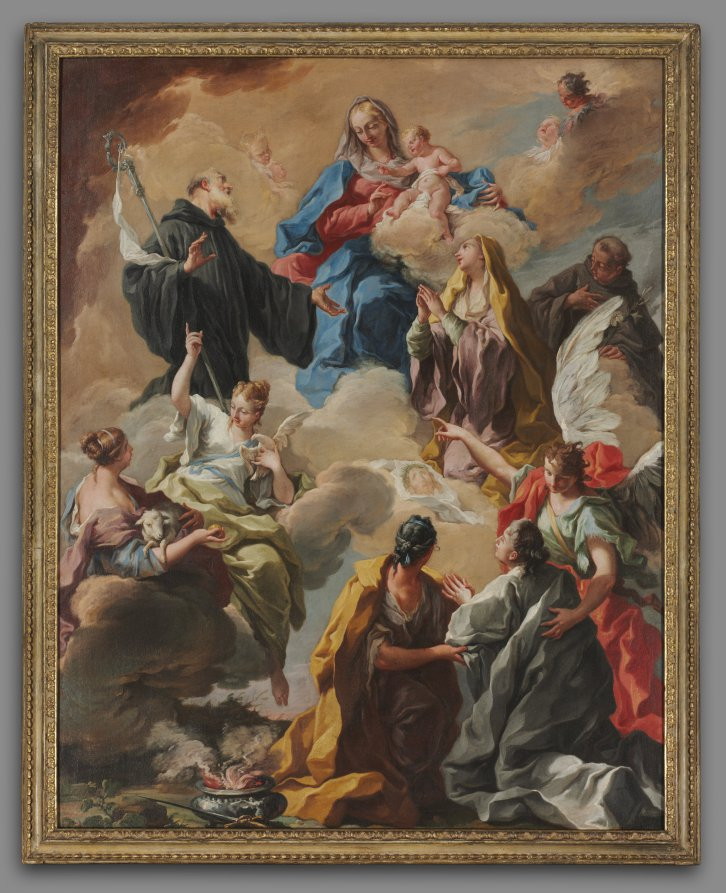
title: Saints Presenting a Devout Woman to the Virgin and Child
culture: Italy, 18th century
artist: Giovanni Battista Pittoni (Italian, 1687–1767)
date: 1720s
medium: oil on canvas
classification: Painting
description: A devout woman, shown at lower right, is presented by saints and an angel to the central Virgin and Child. In clockwise order from her is Saint Lucy, identified by the cauldron and sword at her feet; Saint Agnes, by the lamb; Saint Scholastica, by the dove she holds; and Saint Benedict, characterized by his crozier and Benedictine habit. Slightly below the central Madonna is Saint Veronica, whose head is covered. Behind Saint Veronica, Saint Anthony of Padua, wearing a Franciscan habit and holding a lily stalk, stands in a pose of adoration. Below Saint Anthony and next to the woman is an angel. The identity of the woman is uncertain, but she may be the painting's patron. Pittoni uses dramatic gestures and elegant drapery, while the soft treatment of light and rich colors reflect Pittoni's study of French Rococo art during his stay in France in 1720. In the crowded composition, Pittoni has emphasized the importance of the religious event. His experimentation with composition is evident in the legs of Saint Agnes's lamb; as the painting has aged, a third front leg that Pittoni had painted over has become visible.